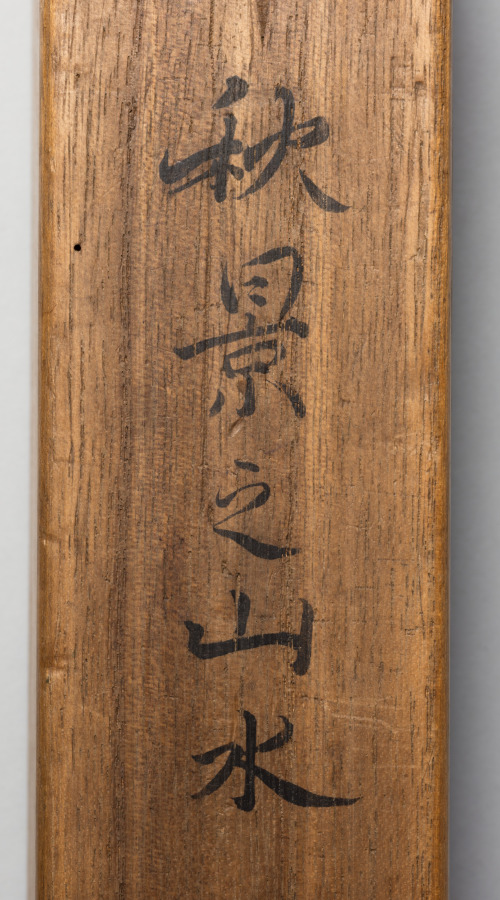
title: Chinese Literatus in an Autumn Landscape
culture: Japan, Muromachi period (1392–1573)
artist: Josui Sōen (Japanese, active c. 1489–1500)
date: late 1400s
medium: hanging scroll; ink on paper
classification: Painting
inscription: Signed: "Sō'en" 宗淵. Sealed: "Josui" 如水; one seal unread.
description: In this painting, Sesshū Tōyō’s disciple Sōen depicts a Chinese scholar-official astride a donkey with his attendant behind. Framing their passage on the right side of the scene are two bare willows, and on the left, geese in flight, the cries of which capture the pair’s attention. These elements suggest that the season is late autumn. Sōen, who famously received Sesshū’s 1495 Splashed-ink Landscape as a certificate of his success as a pupil, studied with the master in Suō, presentday Yamaguchi, after which he returned to his native province in the Kanto region.